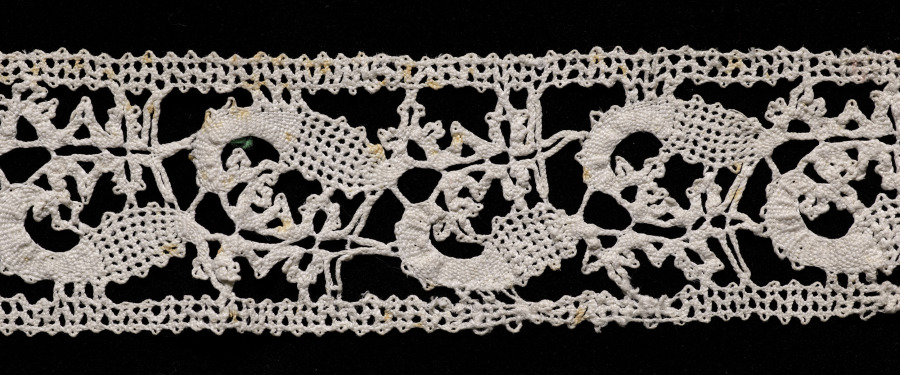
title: Lace Insertion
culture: Italy, Venice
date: 1600–1640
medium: Bobbin lace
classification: Lace